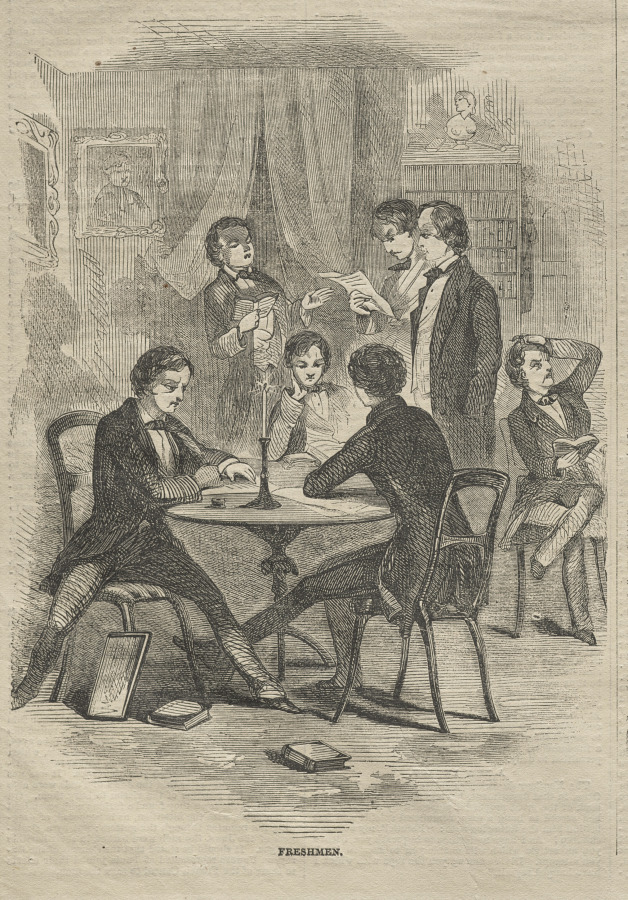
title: Freshmen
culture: America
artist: Winslow Homer (American, 1836–1910)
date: 1857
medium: wood engraving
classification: Print